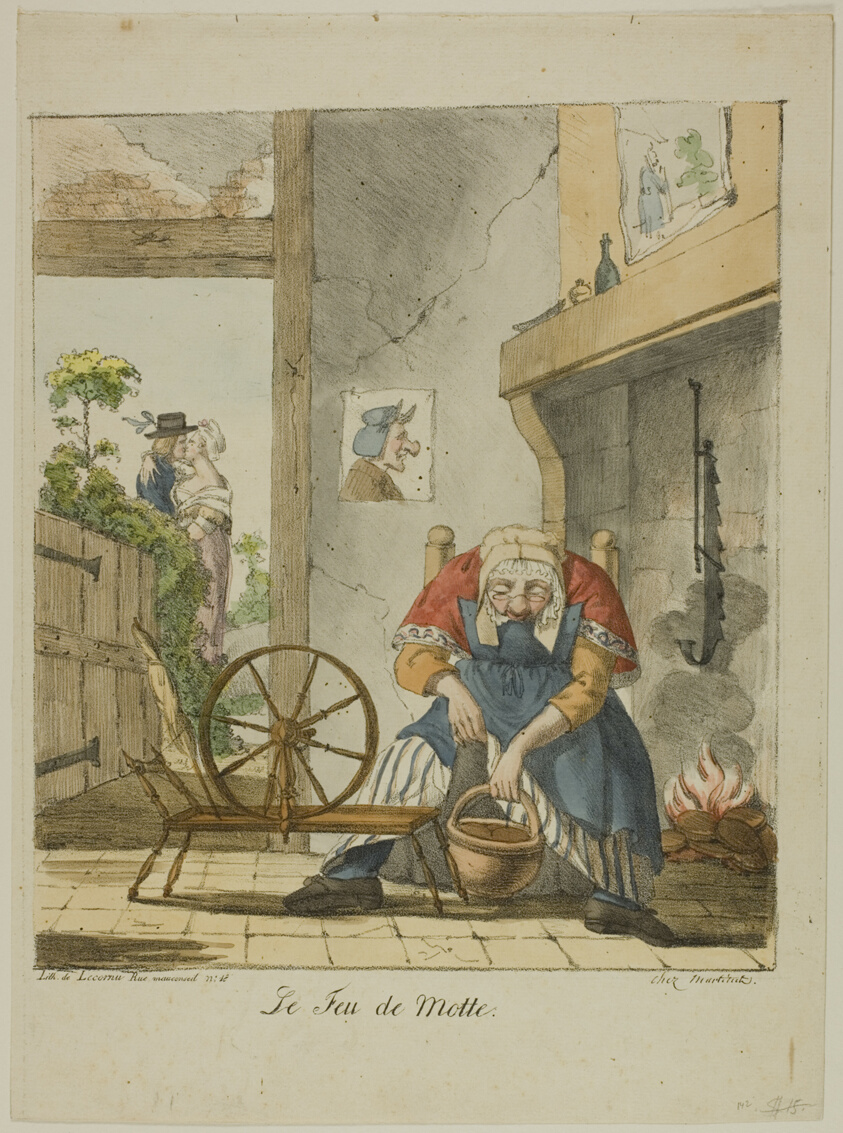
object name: Print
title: Le Feu de Motte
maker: Lecornu (French, 18th-19th century)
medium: Lithograph in black with hand-coloring on ivory laid paper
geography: France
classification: lithograph; print; prints and drawing